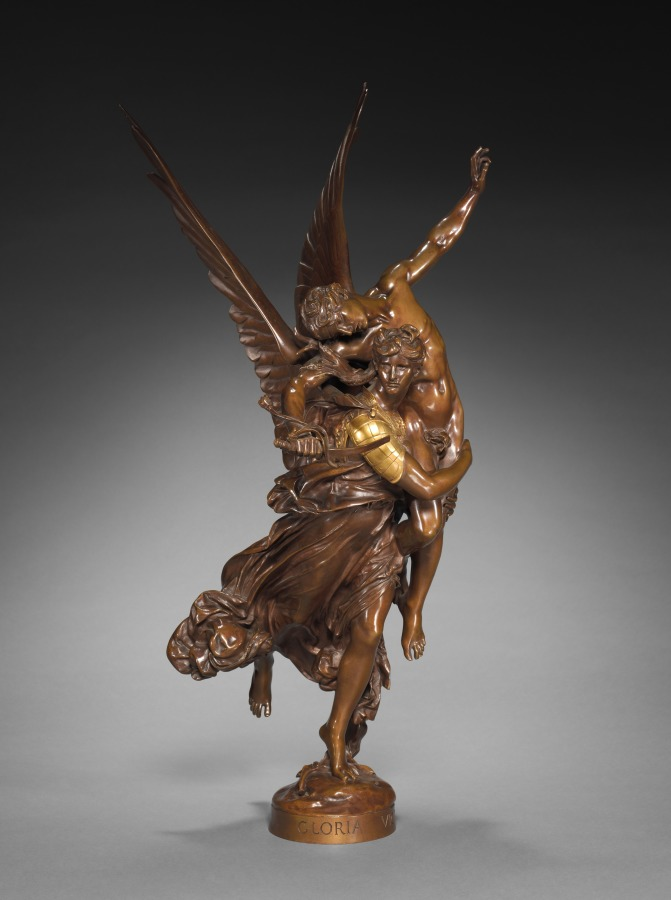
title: Gloria Victis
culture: France, 19th century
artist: Antonin Mercié (French, 1845–1916)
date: c. 1880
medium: bronze with gilding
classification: Sculpture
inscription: Signed near foot at right: "A. MERCIE."; inscribed rear: "F. BARBEDIENNE. FONDEUR."; inscribed front of base: "GLORIA VICTIS."